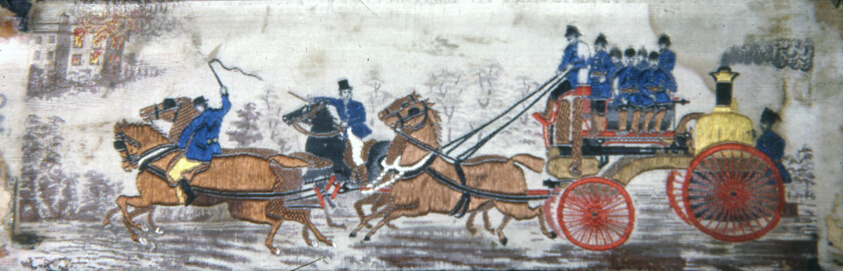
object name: Textile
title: "The Fire Engine (Heroism on Land)"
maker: Woven by Thomas Stevens (English, 1828–88); Coventry, England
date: 1875/1900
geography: Coventry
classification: textile; weaving